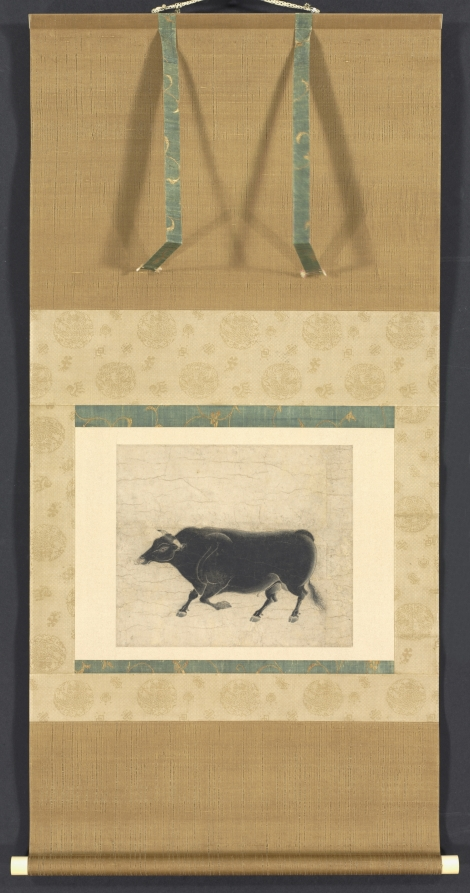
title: Swift Bull from the Ten Swift Bulls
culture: Japan, Kamakura period (1185–1333)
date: late 1200s–early 1300s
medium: section of a handscroll mounted as a hanging scroll; ink and slight color on paper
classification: Painting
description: Across the world, animals once played a much larger role in the transportation of the elite. Members of Japan’s imperial court traveled in vehicles pulled by oxen until the late 1400s, when oxcarts were restricted to ceremonial use. One sign of the past importance of the ox as a status symbol survives in this fragment from a scroll of portraits of 10 speedy bulls. The painter layered washes containing differing ratios of black ink to water to create a three-dimensional effect.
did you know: We know the original scroll had ten bulls because a copy of the complete scroll exists.